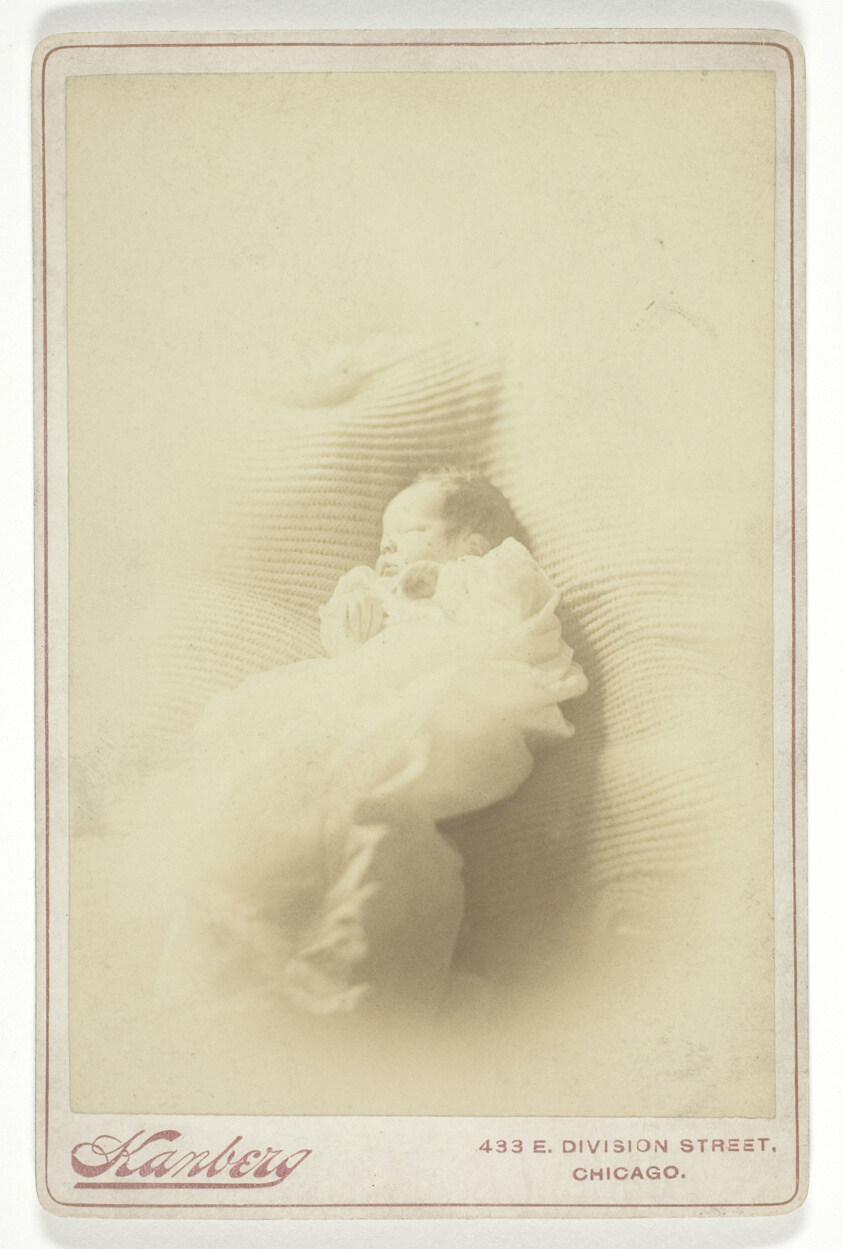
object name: Photograph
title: Harriet Warner Walker, less than 24 hr. old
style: 19th century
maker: J. J. Kanberg (American, active 1870s–1890s)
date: n.d. (1870/1890)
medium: Albumen print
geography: United States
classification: cabinet card (albumen); albumen silver print; photographic process; photography; photograph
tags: portraits, portraits: child subject, photography